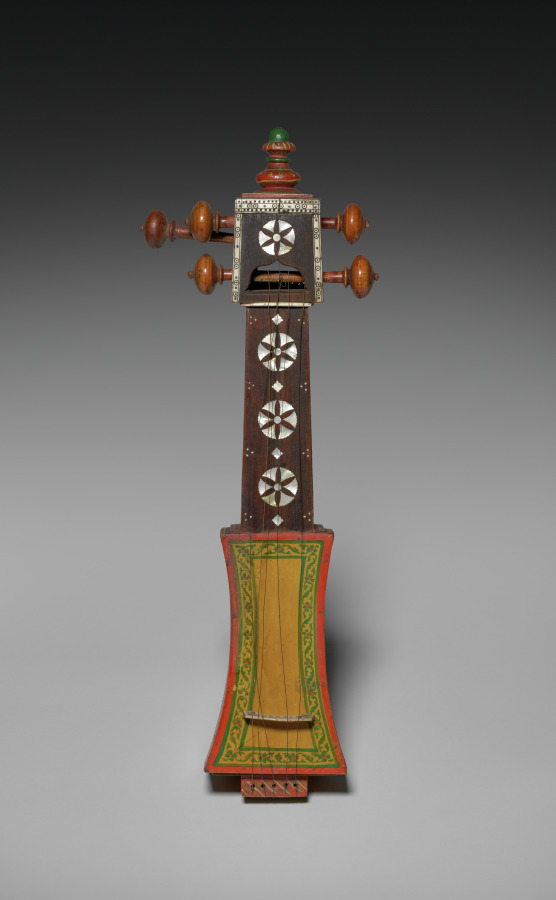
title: Sarangi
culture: India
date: 1800s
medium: Gum tempera and gold on wood with mother-of-pearl and bone or ivory inlays; metal strings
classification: Musical Instrument